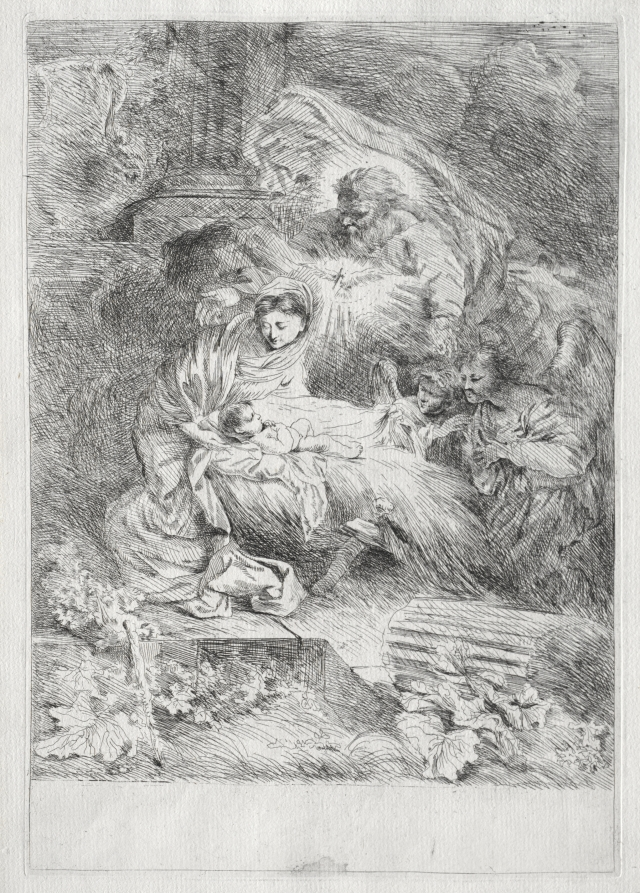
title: The Nativity with God the Father and the Holy Spirit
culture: Italy, 17th century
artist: Giovanni Benedetto Castiglione (Italian, 1609–1664)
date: c. 1645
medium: etching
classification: Print